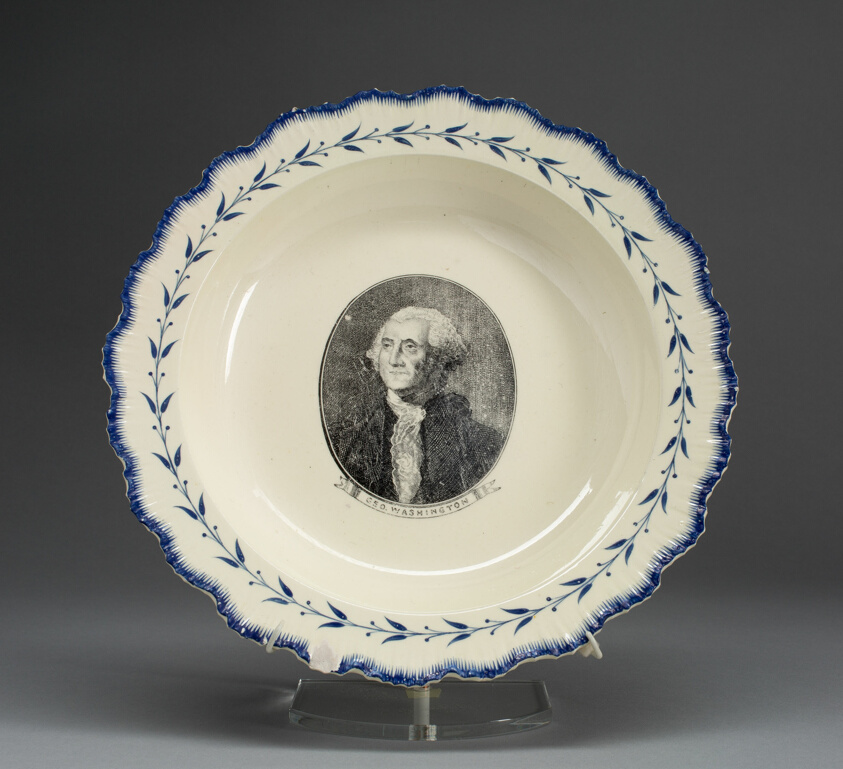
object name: Decorative Arts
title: Soup Plate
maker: English for the American market; Leeds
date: c. 1790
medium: Creamware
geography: England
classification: plate (general, dish); tableware; american decorative arts; porcelain; european decorative arts; ceramics; decorative arts